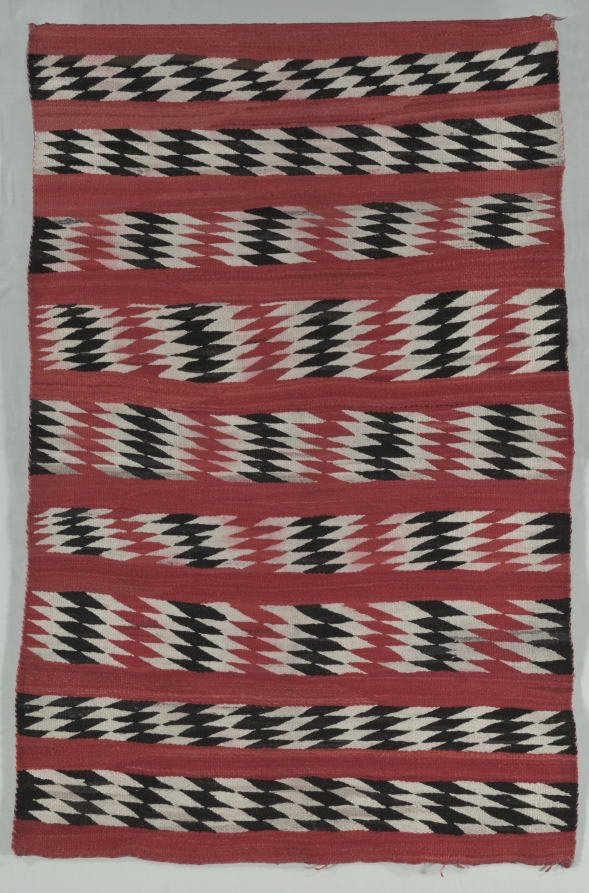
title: Rug Banded with "diamond stripes"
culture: America, Native North American, Southwest, Navajo, Post-Contact, Transitional Period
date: c. 1890–1900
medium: tapestry weave: wool (handspun)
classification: Textile